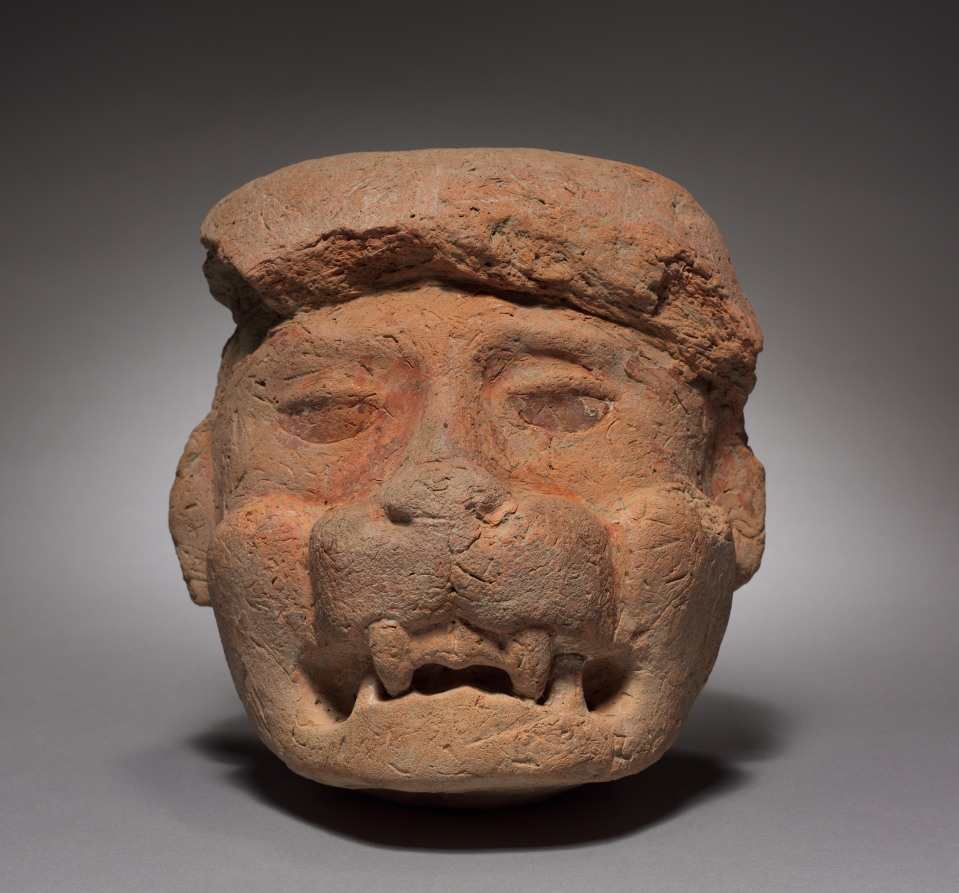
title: Architectural Sculpture Fragment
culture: Mexico, Oaxaca, Zapotec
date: c. 700–1000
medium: unfired clay, covered with painted stucco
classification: Ceramic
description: This architectural sculpture fragment probably once formed part of a tomb façade; technically similar sculptures have been found at the Zapotec site Lambityeco. Ancestral tombs were usually located beneath the courtyard of the family home and were often reused for successive generations. This image of a man wearing a feline mask over the lower face may portray a lineage founder.